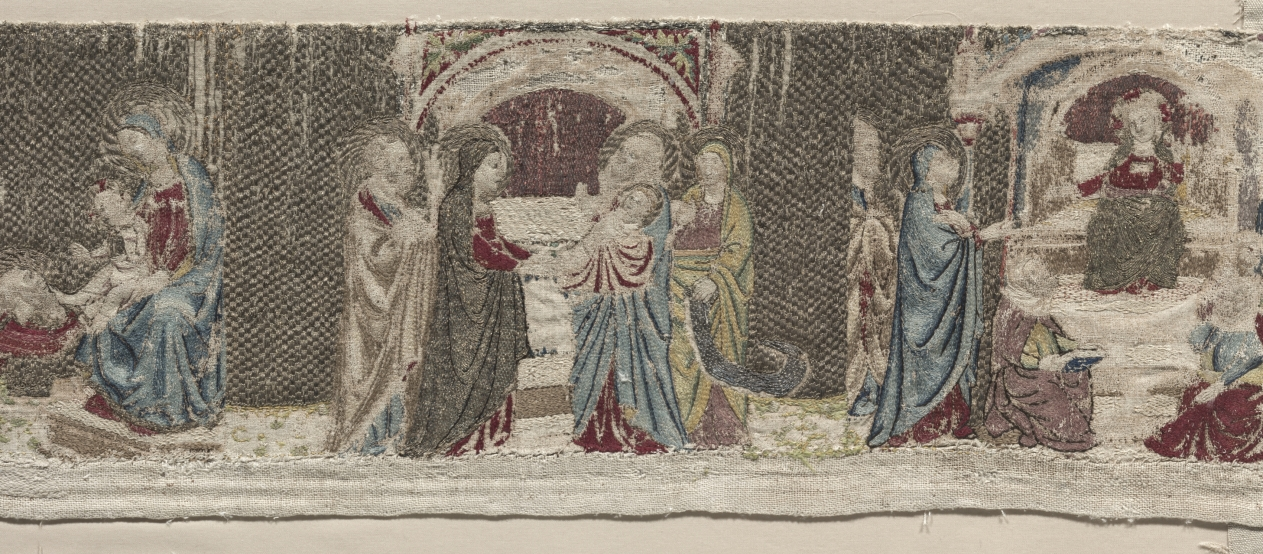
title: Scenes of the Life of the Virgin, from an Altar Frontal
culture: Italy, Florence, 14th century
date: 1330s or 1340s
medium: Silk, gold thread, linen; raised work, embroidery: split, stem, running, fishbone, and couching stitches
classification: Embroidery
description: This rare panel originally hung above a large embroidery that decorated the front of an altar in a church. The narrative begins with the Virgin’s parents and her early life; that panel is now in the Toledo Museum of Art. Cleveland’s portion continues the story with the Annunciation of the Virgin, Adoration of the Shepherds, Adoration of the Magi, Presentation of Christ, Christ among the Doctors, and the Assumption of the Virgin. The Death of the Virgin scene is likely missing. Painters usually sketched designs on stretched linen for embroiderers. Gold thread enriches the background and is secured in place with couching stitches in a small brick pattern.